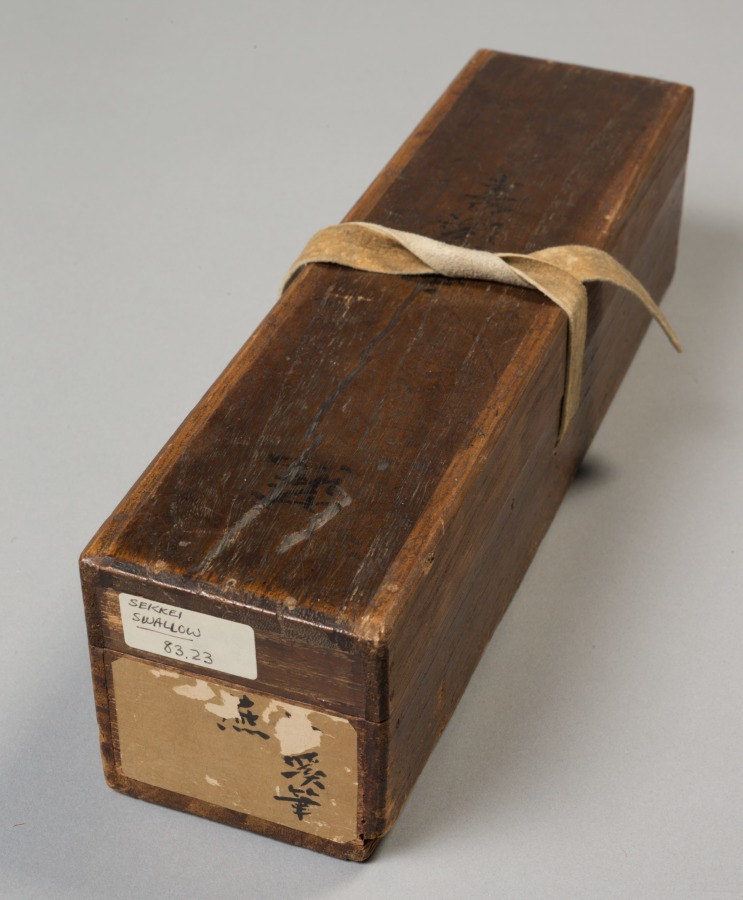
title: Swallows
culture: Japan, Edo period (1615–1868)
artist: Yamaguchi Sekkei (Japanese, 1644–1732)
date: late 1600s–early 1700s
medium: hanging scroll; ink and color on paper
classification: Painting